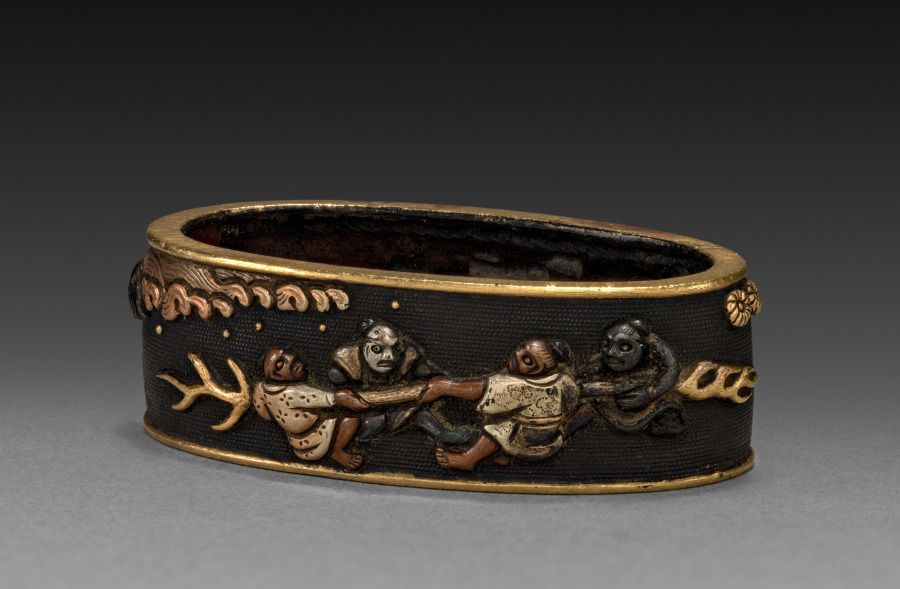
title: Sword-Hilt Collar (Fuchi)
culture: Japan, Edo period (1615–1868)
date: 1700–1850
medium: shakudo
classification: Arms and Armor